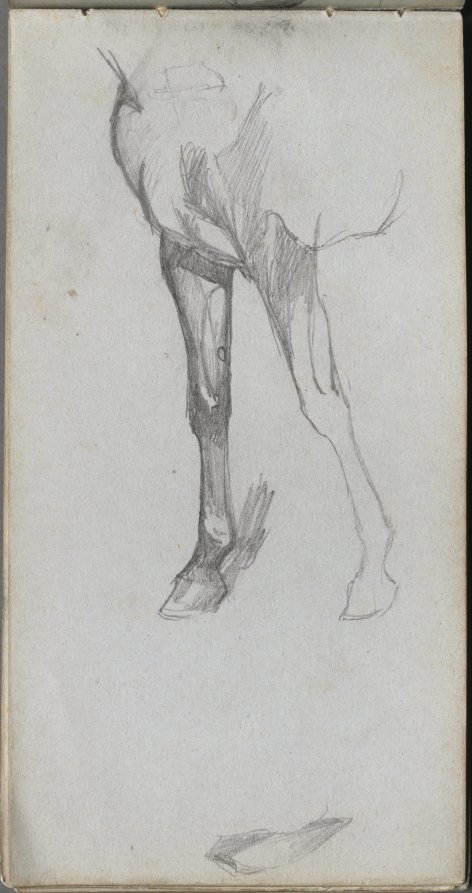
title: Sketchbook, page 66: Study of a Horse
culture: France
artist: Ernest Meissonier (French, 1815–1891)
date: c. 1860s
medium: graphite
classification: Bound Volume